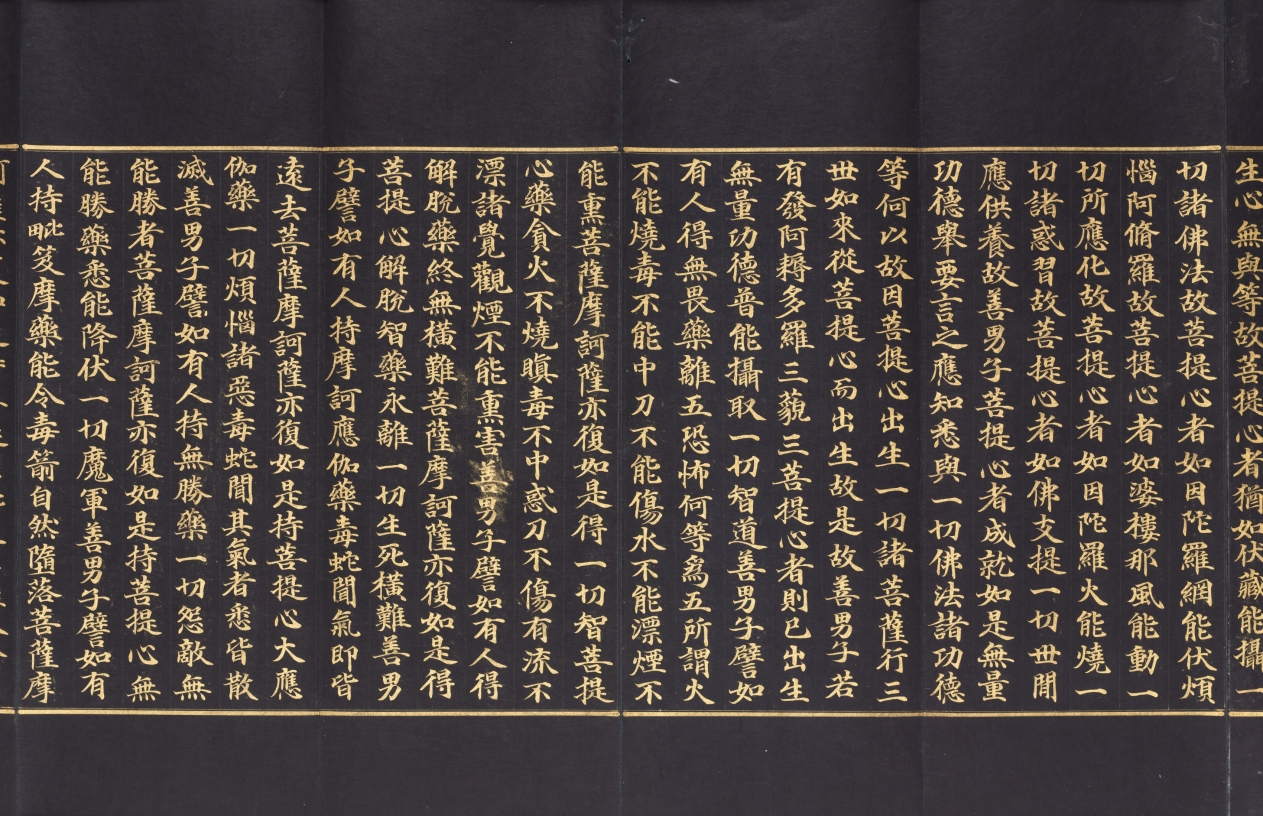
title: Avatamsaka Sutra No. 78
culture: Korea, Goryeo dynasty (918–1392)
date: 1300s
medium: Folded book with illustrated frontispiece; gold and silver on mulberry paper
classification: Bound Volume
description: This illuminated manuscript presents one part of the multivolume sacred text titled Avatamsaka (Flower Garland) sutra. Both the script and the image are rendered in gold ink on the smooth surface of the dark blue, indigo-dyed mulberry paper. This portion of the text, which reads from right to left, describes the encounter of the Buddha of the Future (Maitreya) and the young pilgrim Sudhana. The Buddha gives his words of wisdom to Sudhana, who asks questions about the path toward spiritual awakening. Mixed with ink and glue, the gold has a brilliance that strikingly reflects Sudhana’s ardent quest for understanding the way to reach enlightenment.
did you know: The pristine condition of this manuscript indicates that it was rarely used after its creation, revealing that the act of making a manuscript rather than reading it was the main religious goal.